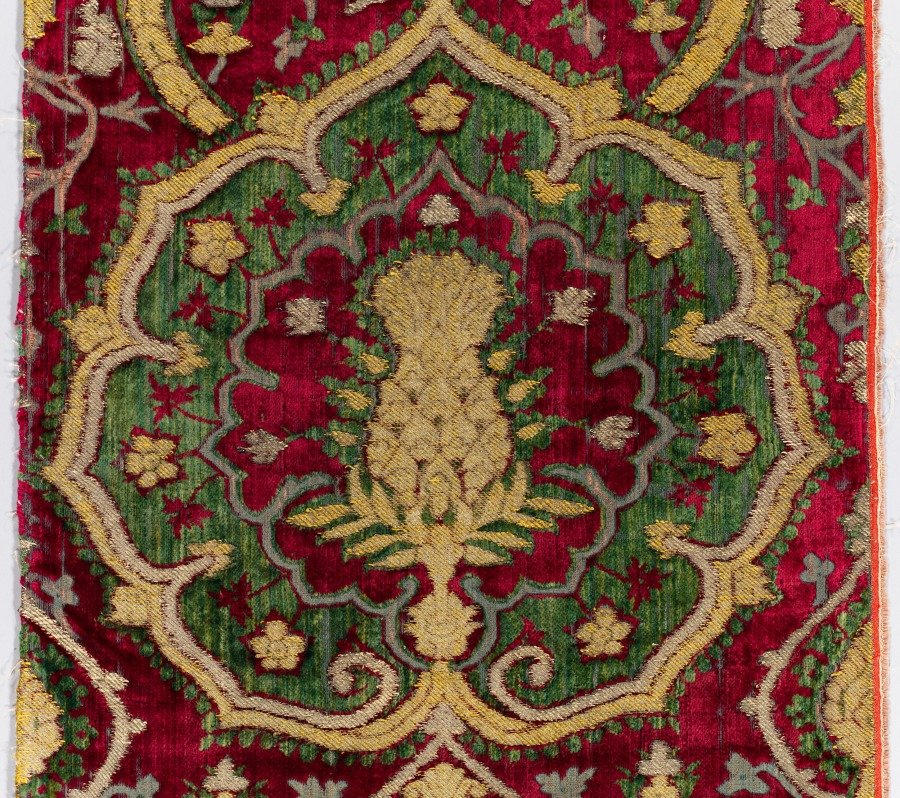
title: Brocaded Velvet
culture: Turkey, early 16th Century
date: c. 1500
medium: velvet: silk, brocaded with gold and silver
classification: Velvet